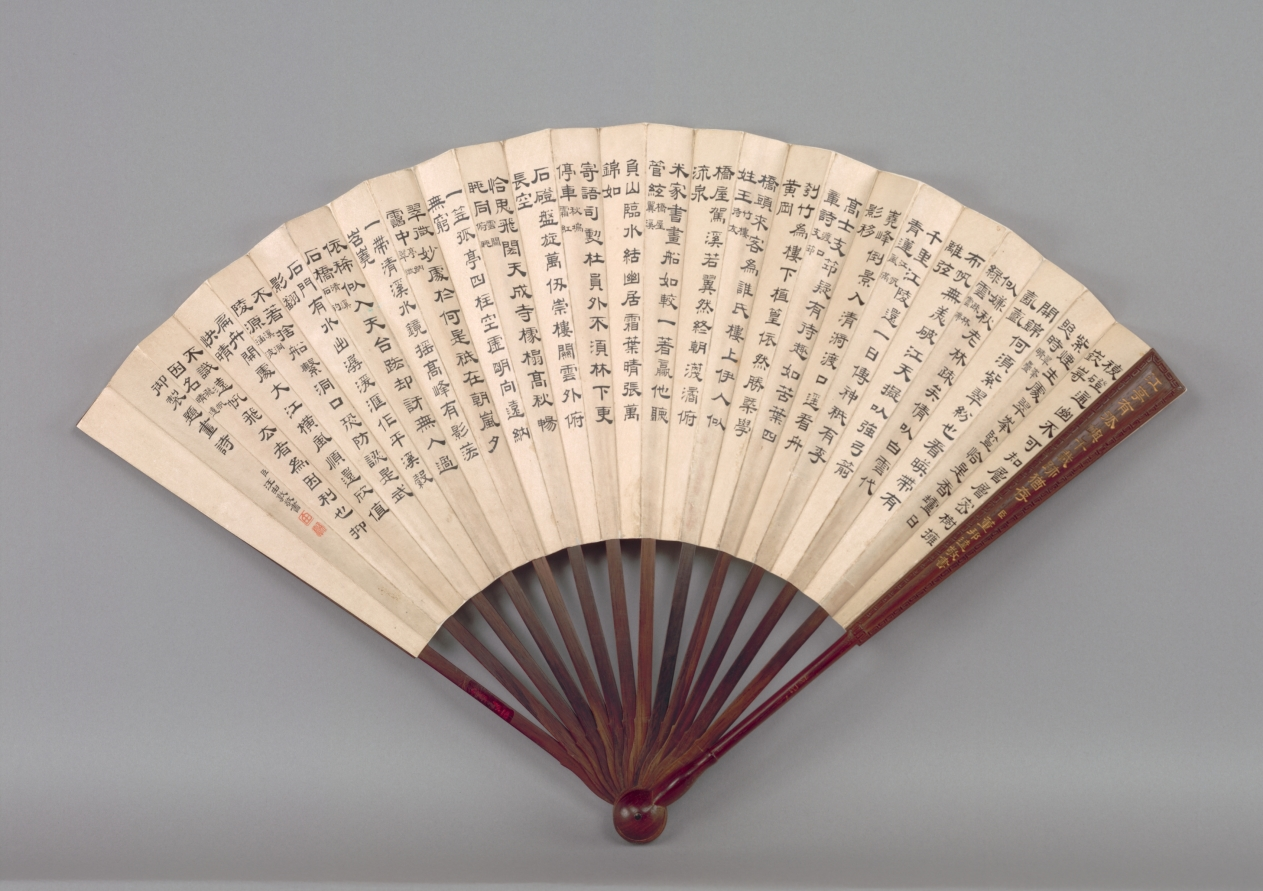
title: A Vignette of Life on the Frontier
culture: China, Qing dynasty (1644-1911), Kangxi period (1662-1722)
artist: Jiao Bingzhen (Chinese, active c. 1670–1726)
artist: and Giuseppe Castiglione (Italian, 1688–1766)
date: c. 1717–22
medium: Folding fan; ink and color on paper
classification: Painting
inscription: 塞上野趣圖。奉勅寫真。臣焦秉貞郞世寧合筆恭繪。[印]秉貞; 世寧.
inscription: 2 seals of the Qianlong emperor (r. 1736-95). 12 poems by the Qianlong emperor and inscribed in clerical script by Wang Youdun 汪由敦 (1692-1758).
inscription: 1 poem incised on the outer ribs of the fan, front and back by Dong Bangda 董邦達 (1699–1769).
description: Jiao Bingzhen, a court painter largely active during the reign of the Kangxi Emperor, was the senior artist on this fan. Jiao painted the Manchu horse trainer and the setting into which the horse was inserted by Giuseppe Castiglione. Each artist was bonded to his own artistic tradition, while flexibly and harmoniously accommodating the others’ style. Jiao’s brushwork displays rigor and control, particularly in the twisting and turning trunk of the willow. The treatment of the figure and his clothes is an exercise in linearity. The horse trainer’s gesture and posture closely adhere to the known repertoire of the Chinese figural tradition, but the specificity supplies a sense of documentary reportage of life on the frontier. His shaved forehead and white temples identify him as a Manchu. The thick fabric of his garments was defined in a different sort of brush line than Jiao typically used for Chinese scholars or travelers. Jesuit priest Castiglione, a newcomer to China at the time this was painted, brought a sense of Western realism to the horse. Poised at a slight angle, the horse is alert, its eye gleaming. Its contours suggest the bulk of its anatomy with skilled but not overpowering modelling, and careful and subtly wrought attention to detail, such as fluttering strand of mane. Because of his ability to combine traditional Chinese painting techniques with Western methods of perspective and chiaroscuro, Castiglione went on to be the most favored and honored of the missionary artists who served the early Qing emperors. Throughout his career, in addition to imperial demands for portraits and records of court events, Castiglione continued to paint favored imperial horses. These animal subjects reflect the desire of Kangxi and his successors to celebrate their nomadic origins and to keep alive the martial prowess of the Manchu warriors in their new and sedentary world of conquered China.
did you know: One horseshoe is visible beneath the uplifted hoof.